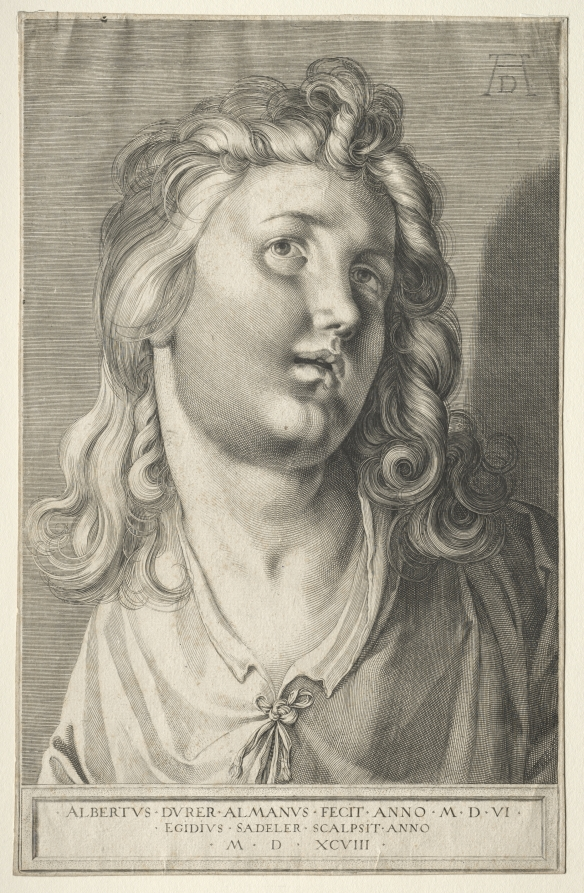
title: Female Head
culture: Flanders, late 16th Century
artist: Aegidius Sadeler (Flemish, c. 1570–1629)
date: 1598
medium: engraving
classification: Print